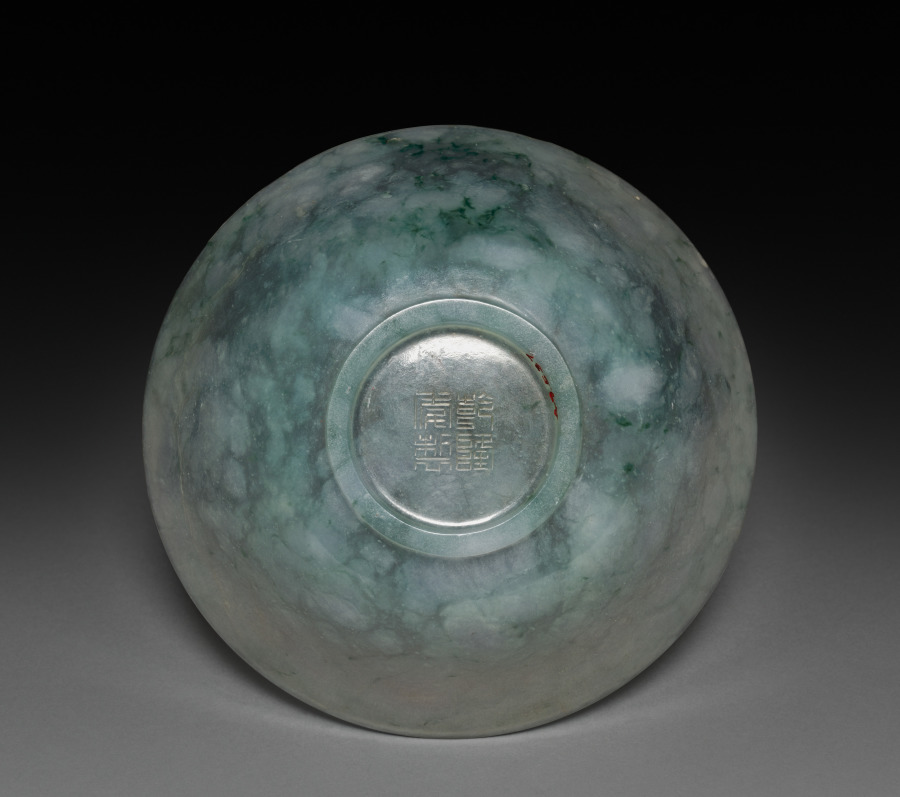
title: Bowl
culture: China, Qing dynasty (1644–1911), Qianlong mark and reign (1736–95)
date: 1736–95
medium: jade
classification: Jade